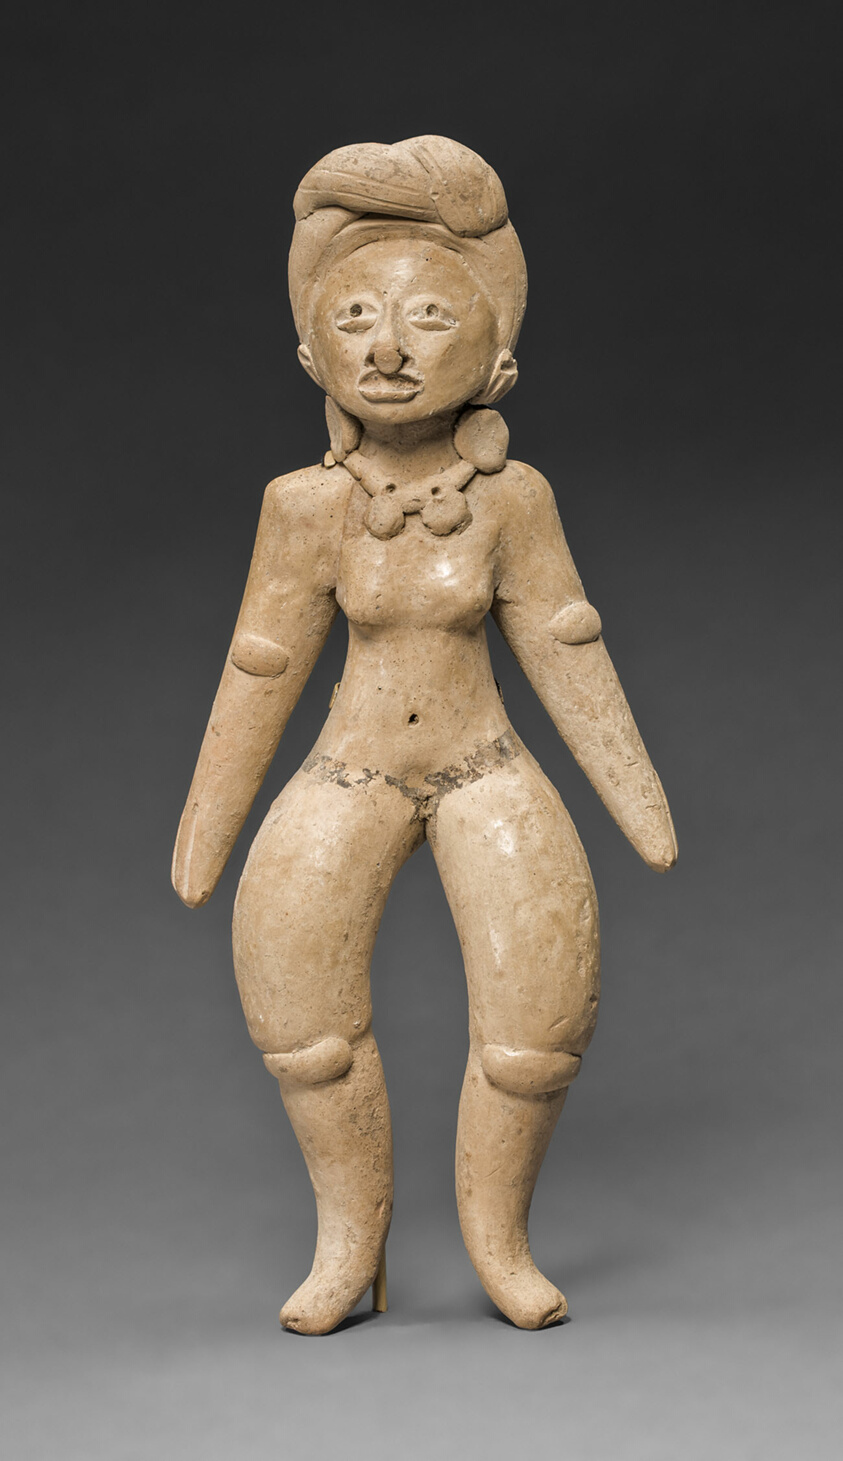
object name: Sculpture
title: Female Figurine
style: huastec, native american, americas, mesoamerican, veracruz, Arts of the Americas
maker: Huaxtec; Pánuco River Valley, northern Veracruz, Mexico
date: 800–1400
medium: Ceramic and pigment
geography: Veracruz state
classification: earthenware; art of the americas; ceramics; sculpture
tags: people, female